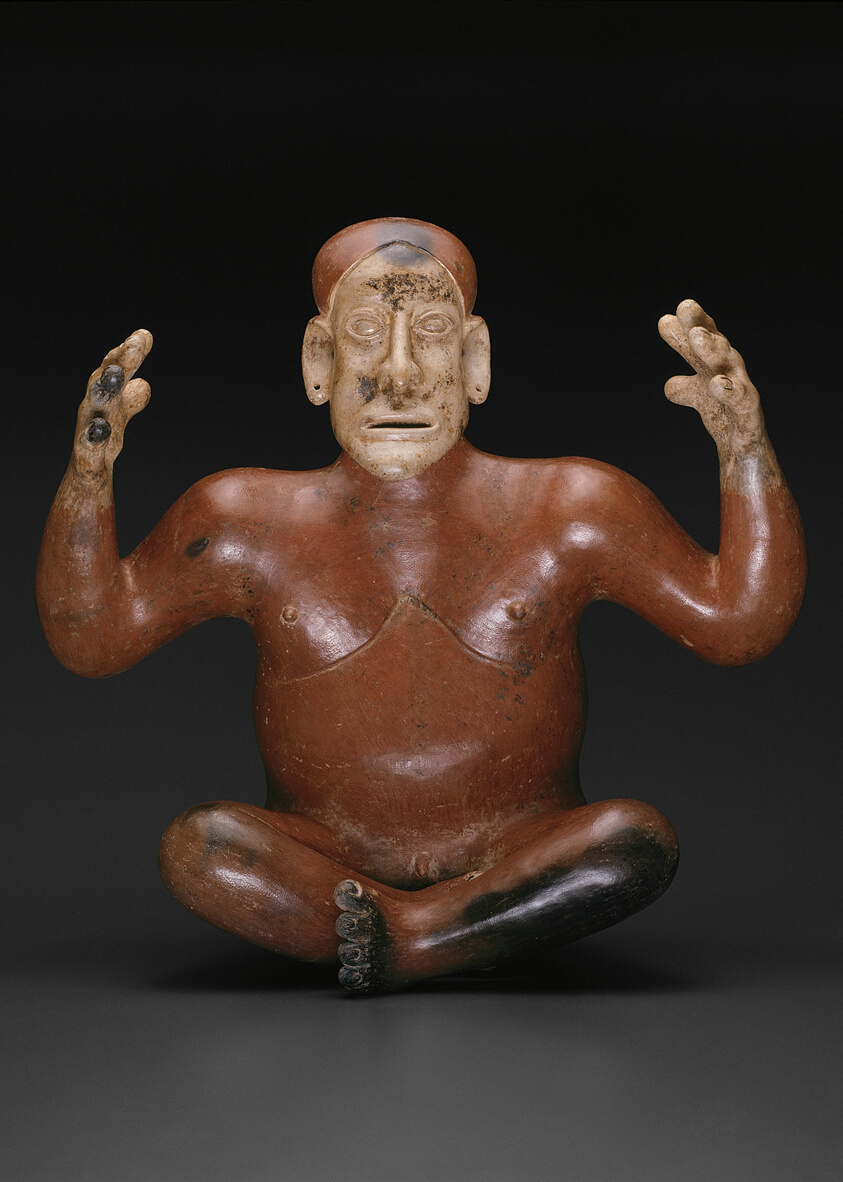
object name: Sculpture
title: Storyteller Figure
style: jalisco, ameca-zacoalco, mesoamerican, Pre-Columbian, americas, west mexico, ameca, Arts of the Americas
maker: Jalisco (Ameca Valley, Jalisco, Mexico)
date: 100–800 CE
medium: Ceramic and pigment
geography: Jalisco state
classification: ceramics; earthenware; sculpture; art of the americas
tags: people, ancestors, gestural, leaders